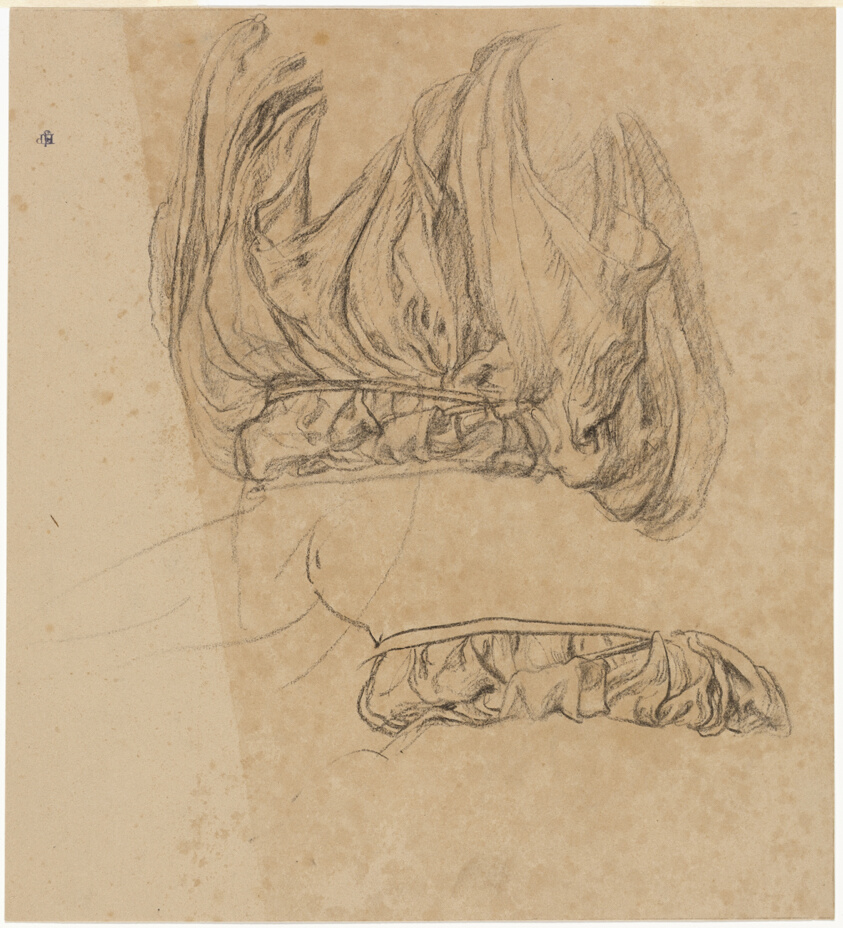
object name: Drawing and Watercolor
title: Study for Festival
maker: Sir Edward John Poynter; English, 1836-1919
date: c. 1875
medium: Black chalk on buff wove paper, hinged onto cream wove paper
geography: England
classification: chalk; paper; prints and drawing